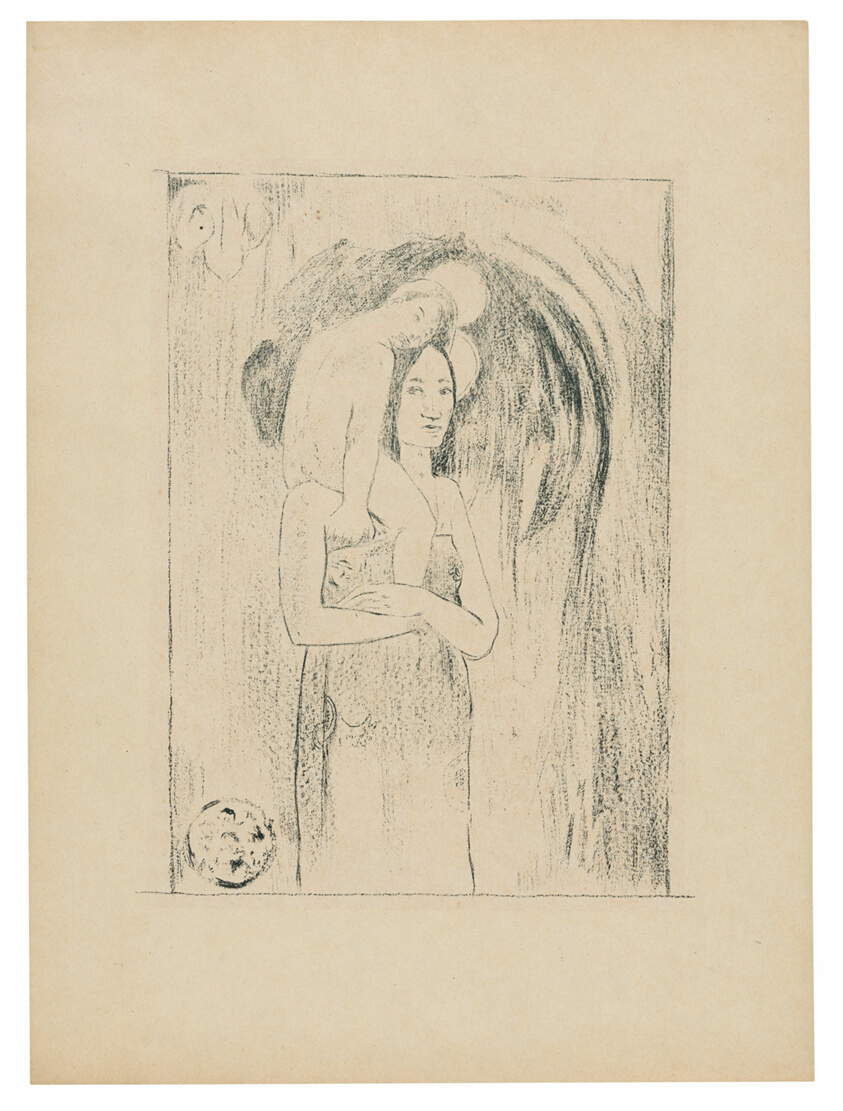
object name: Print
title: Ia orana Maria (Hail Mary)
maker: Paul Gauguin (French, 1848-1903)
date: 1894/95, published Mar. 1895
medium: Transfer zincograph on coarse-grained transfer paper, in dark-blue ink on thin ivory wove paper (an imitation Japanese vellum)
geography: France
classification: zincograph; print; prints and drawing